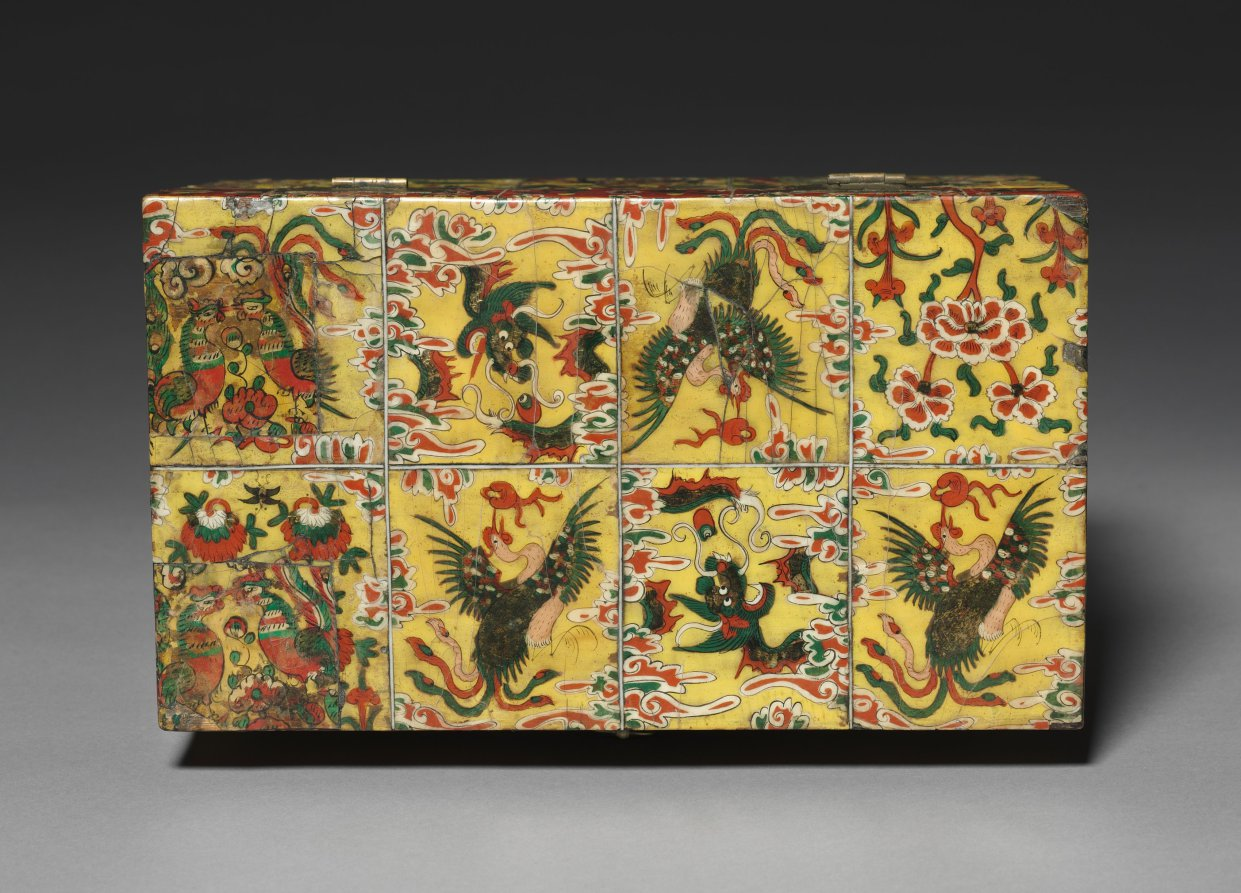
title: Box with Painted Oxhorn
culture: Korea, Joseon dynasty (1392–1910)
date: 1800s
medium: painted wood with flattened ox-horn inlay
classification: Miscellaneous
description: This box is colorfully decorated with the technique of oxhorn plating. The oxhorn was cut, soaked in water, boiled, and then pressed into thin translucent sheets. Since oxhorns are usually rather small, dozens of them were required to fully decorate even a small wooden object. This box is colorfully painted with the imagery of auspicious plants and animals such as dragons amid clouds, a white tiger under the pine tree, a grazing deer, and more. This kind of luxurious box was probably produced as a wedding gift.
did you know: This box is made of small flattened pieces of oxhorn. Since oxhorn is usually rather small, possibly dozens of them were used to fully decorate even a small wooden object like this box.